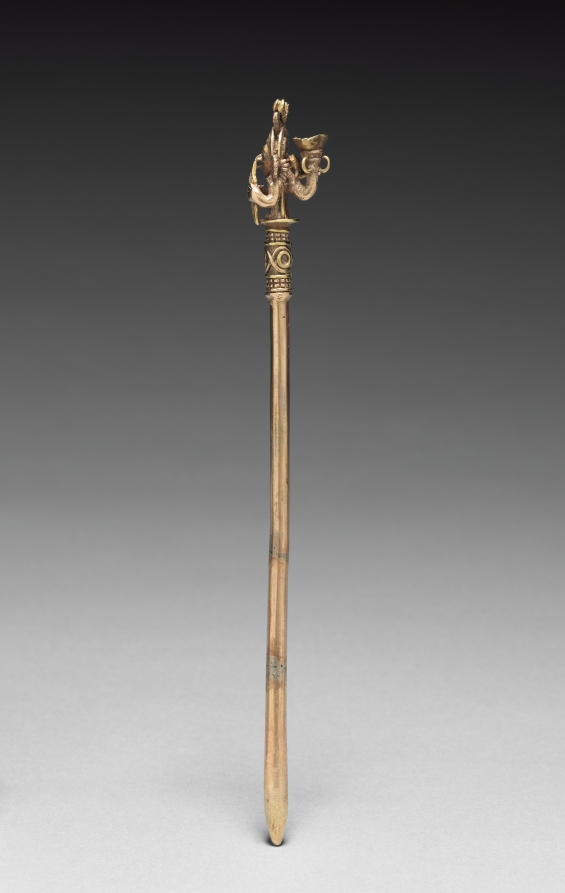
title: Lime Dipper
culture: Colombia, Calima region, Yotoco style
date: c. 1–800 CE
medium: gold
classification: Metalwork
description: Coca-leaf chewing was a widespread ritual in ancient South America. Utensils included a container and a dipper or spoon for powdered lime (made from seashells), added to the coca to enhance its gentle, stimulating effect. Colombian cultures are especially known for transforming these utensils into works of art made of precious metal. The image on the tallest dipper is wonderfully complex. A serpent coils at the bottom, beneath a snarling animal with a huge, vertical tail. This animal has a tiny monkey on its back; the monkey also has a huge tail, which rests on the first animal’s head like a headdress. This intricate image was created with the lost-wax casting process.